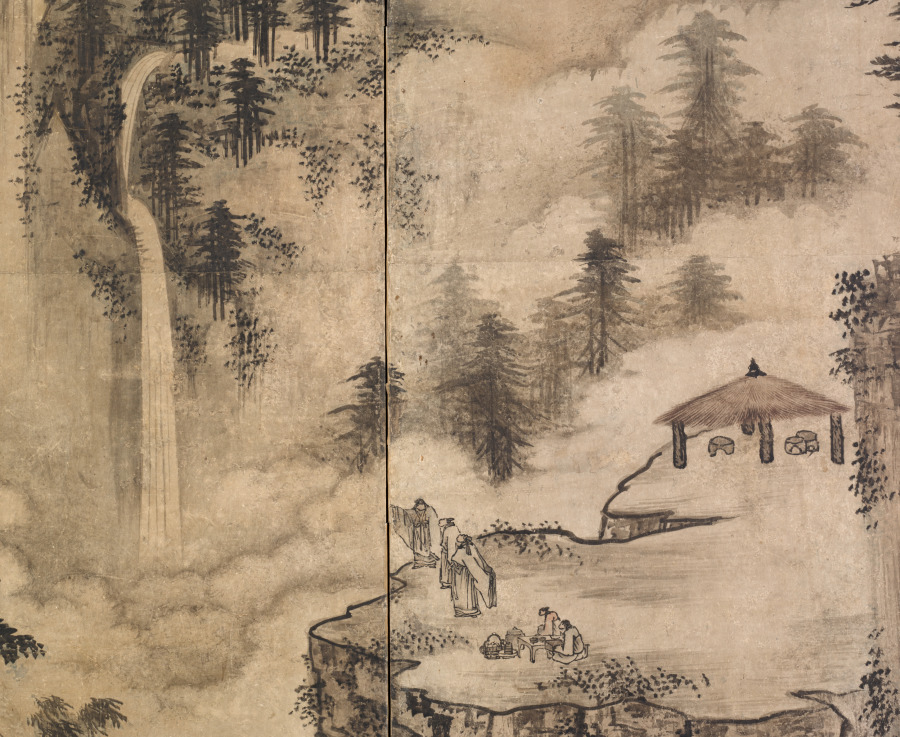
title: Landscape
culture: Japan, Muromachi period (1392–1573)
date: 1550–99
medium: One of a pair of six-panel folding screens; ink and color on paper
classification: Painting